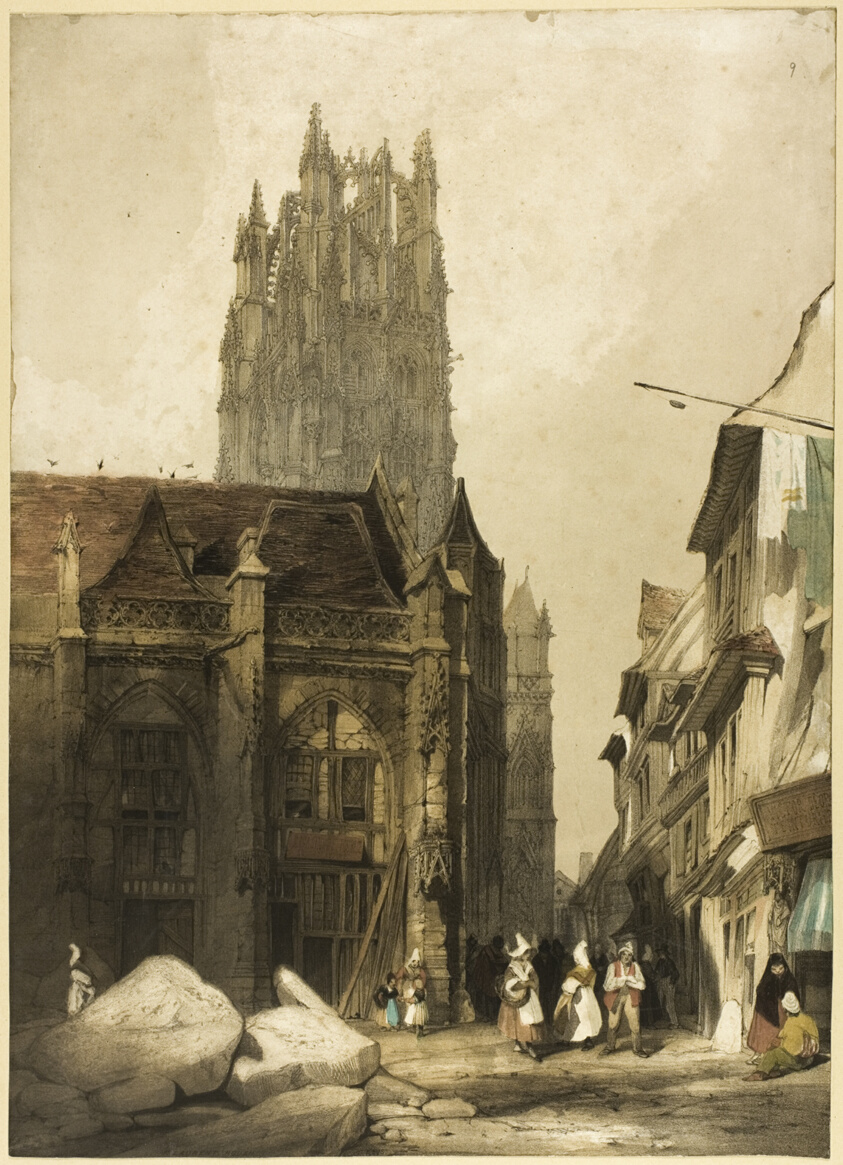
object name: Print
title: Picturesque Architecture in Paris, Ghent, Antwerp, Touen, etc.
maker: Thomas Shotter Boys (English, 1803-1874); published by Charles Joseph Hullmandel (English, 1789-1850)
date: 1839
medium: Color lithograph on paper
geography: England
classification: lithograph; print; prints and drawing